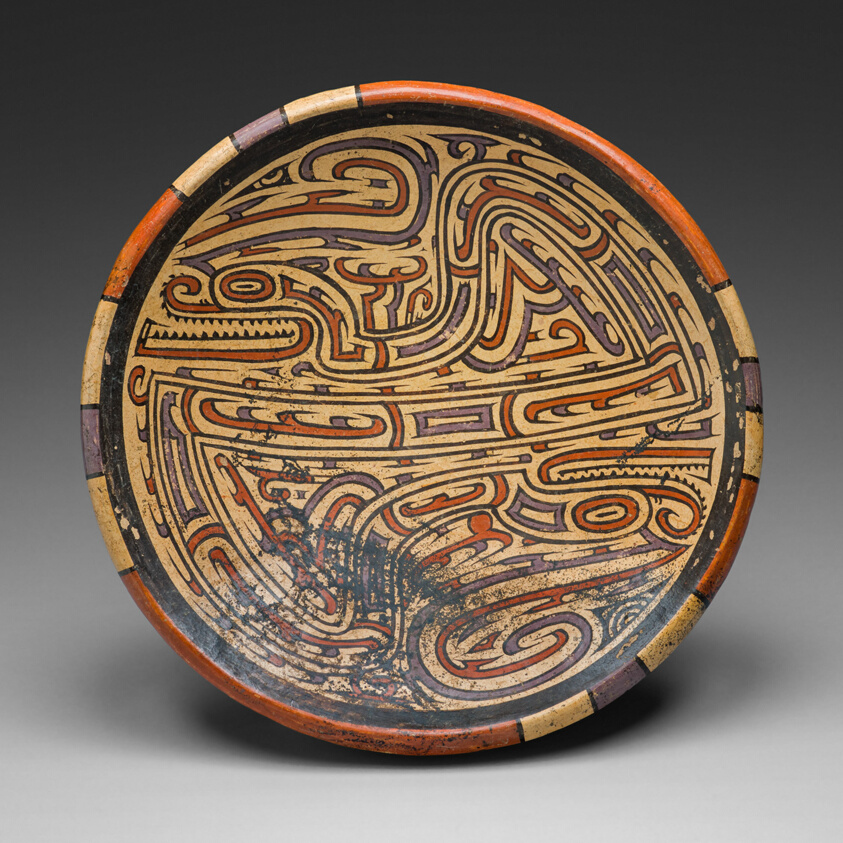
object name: Vessel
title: Pedestal Bowl Depicting Bicephalic Footed Serpent with Headcrest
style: coclé, Pre-Columbian, americas, lower central america, Arts of the Americas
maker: Coclé (Possibly Los Santos province, Panama)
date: 700–1100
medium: Ceramic and pigment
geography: Los Santos province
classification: vessel; earthenware; bowl; ceramics; art of the americas; vessel for serving food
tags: serpents, animals, abstract figures, composite, iguana